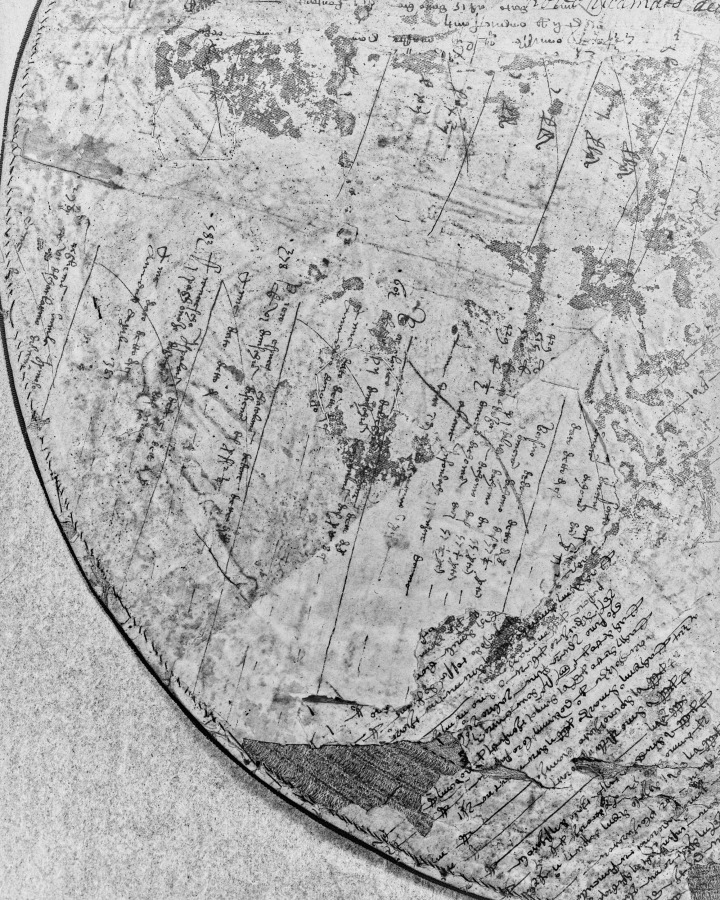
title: Embroidered Tondo from an Altar Frontal: The Coronation of the Virgin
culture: Italy, Florence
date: 1459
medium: Embroidery with gold, silver, and silk thread; split, satin, and couching stitches, or nué (shaded gold)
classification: Embroidery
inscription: the embroidery is backed by an old reused parchment with Latin writing over which in Italian is penned an inscription: "This pallioto was embroidered in the year 1486 by the venerable Margherita del Caccia nun of this monastery. . ." [It is difficult to know to what extent one should rely on this inscription as the style and technique both point clearly to an earlier date.]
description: This masterpiece of Florentine embroidery takes the circular form called a tondo and was likely once attached to an altar frontal. The scene depicts the coronation of the Virgin, the final and culminating event in the narrative cycle of her life. Honoring her as queen of heaven, Christ places the crown on his mother’s head. They are surrounded by eight angels as well as Saints Verdiana and John Gualberto, both much esteemed in Florence, creating a joyous scene. During the Renaissance, Florence emerged as an important center for a specific type of embroidery known as or nué, or shaded gold. This stunning technique used metal and silk threads, as seen here, to create pictures that rivaled paintings. It was frequently used for vestments and altar frontals.